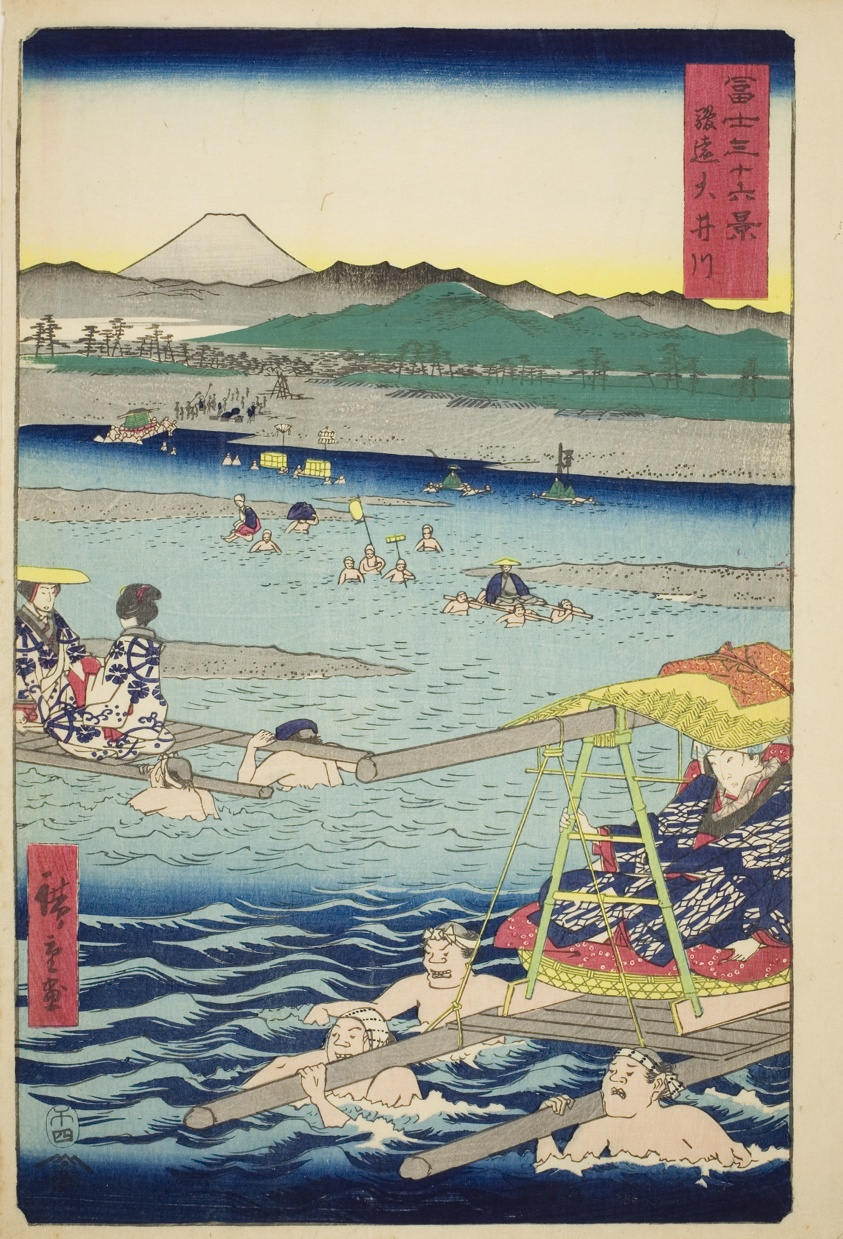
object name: Print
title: The Oi River between Suruga and Totomi Provinces (Sun-En Oigawa), from the series "Thirty-six Views of Mount Fuji (Fuji sanjurokkei)"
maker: Utagawa Hiroshige 歌川 広重; Japanese, 1797-1858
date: 1858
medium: Color woodblock print; oban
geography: Japan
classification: print; asian art